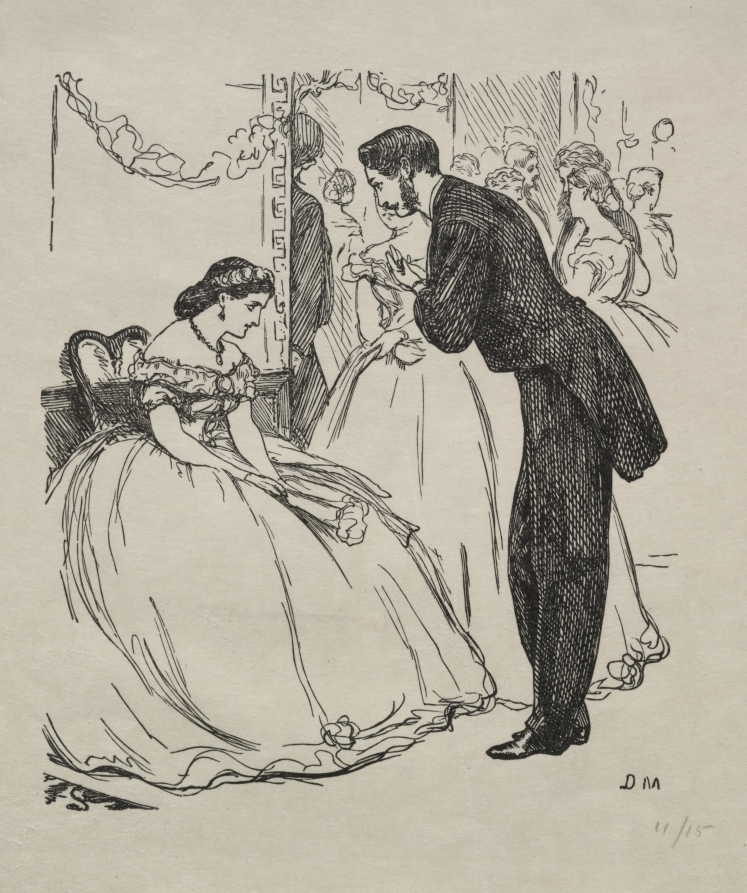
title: The Song of the Disconsolate One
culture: England, 19th century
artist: George Louis Palmella Busson Du Maurier (British, 1834–1896)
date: 1863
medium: wood engraving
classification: Print